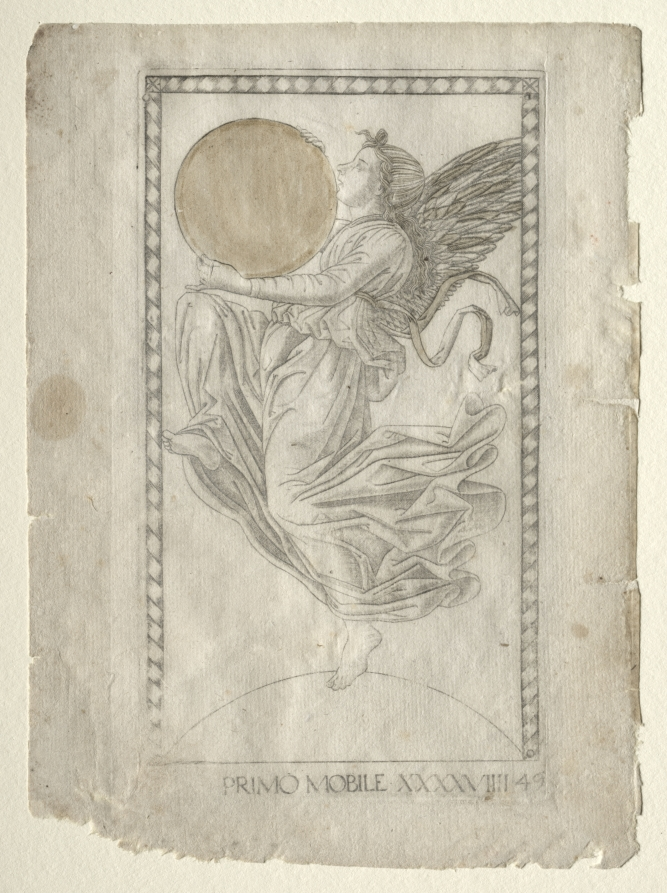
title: The Angel of the Ninth Sphere (from the Tarocchi, series A: Firmaments of the Universe, #49)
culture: Italy, Ferrara, 15th century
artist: Master of the E-Series Tarocchi (Italian, active 1460s)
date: before 1467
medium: engraving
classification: Print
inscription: Lettered below the image of Primo Mobile (Prime Mover): [A] / PRIMO MOBILE·XXXXVIIII / ·49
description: This engraving is part of the Tarocchi group marked with the letter “A”, and named Firmaments of the Universe. This series comprises the seven planets from the classical astronomy (Moon, Mercury, Venus, Sun, Mars, Jupiter, Saturn) and the three celestial spheres that separate them from the Supreme Entity (Prima Causa) from which everything was originated. Here, Primo Mobile (Prime Mover or the Angel of the Ninth Sphere) is personified as a full-length angel, turned to left, and holding up a large sphere in its hands while only standing on its left foot. The Prime Mover corresponds to the ninth and last of the material spheres, beyond the region of the fixed starts. It was believed to be crystalline and invisible, as well as in direct contact with the First Cause—God himself—from which it takes its infinite speed. Thus, it is here shown as an empty disc held by an angel in a dancing pose.